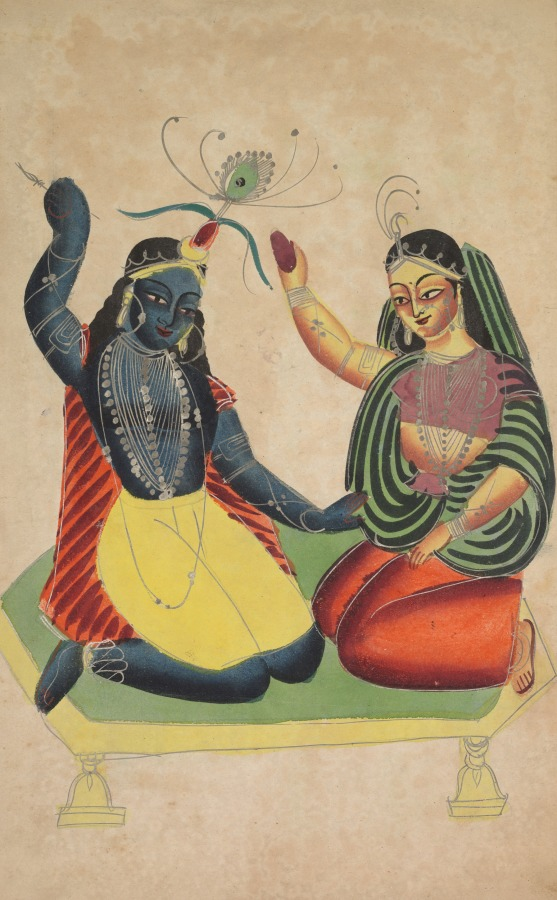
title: Radha and Krishna (verso), from a Kalighat album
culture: Eastern India, Bengal, Kolkata, Kalighat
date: c. 1890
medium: Gum tempera, graphite, ink, and tin on paper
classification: Painting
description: Radha, Krishna’s consort and foremost of the cowgirls (gopis), is depicted here with Krishna, seated on a divan. Popular stories of their romance evoke longing in separation, jealousy, and secret trysts. This image portrays their mutually passionate relationship.